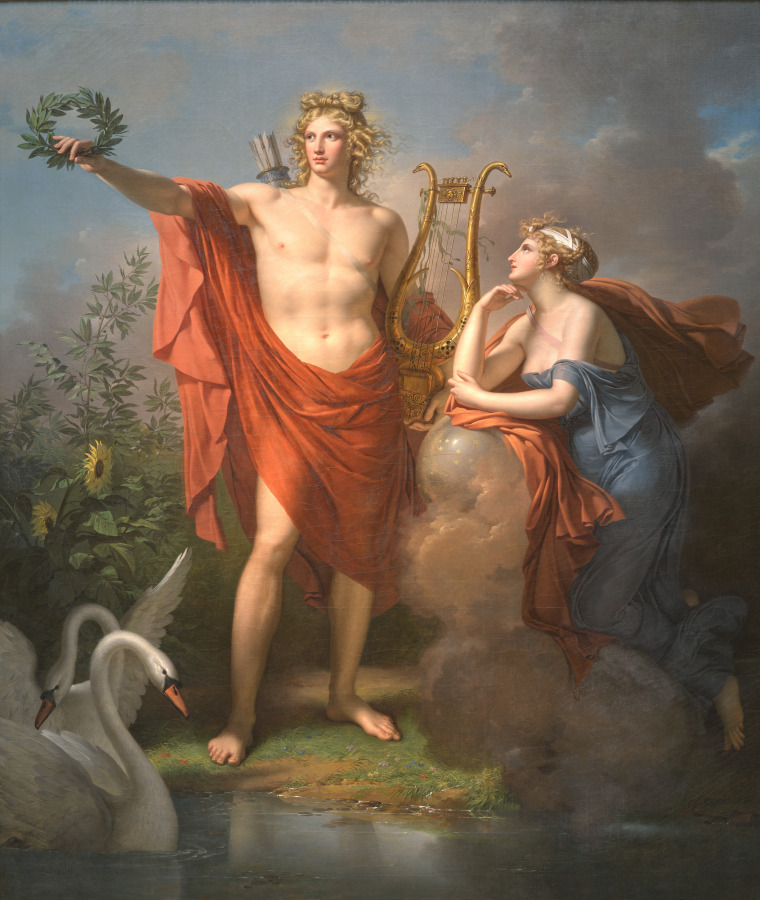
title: Apollo, God of Light, Eloquence, Poetry, and the Fine Arts with Urania, Muse of Astronomy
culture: France, late 18th century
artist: Charles Meynier (French, 1768–1832)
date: 1798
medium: oil on canvas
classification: Painting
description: A recipient of the Grand Prix de Rome in 1789, Charles Meynier became a member of the Académie des Beaux-Arts in 1815 and painted large ceiling decorations at the Louvre and numerous pictures glorifying the Napoleonic legend. Erato, Muse of Lyrical Poetry belongs to a cycle of five paintings executed to fulfill a commission from businessman François Boyer-Fonfréde. They were intended to decorate his home in his native Toulouse and constitute a rare instance of a complete cycle of major paintings that remain intact rather than being split up and separately dispersed.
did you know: Urania leans on a starry orb, indicating her role as the muse of astronomy.